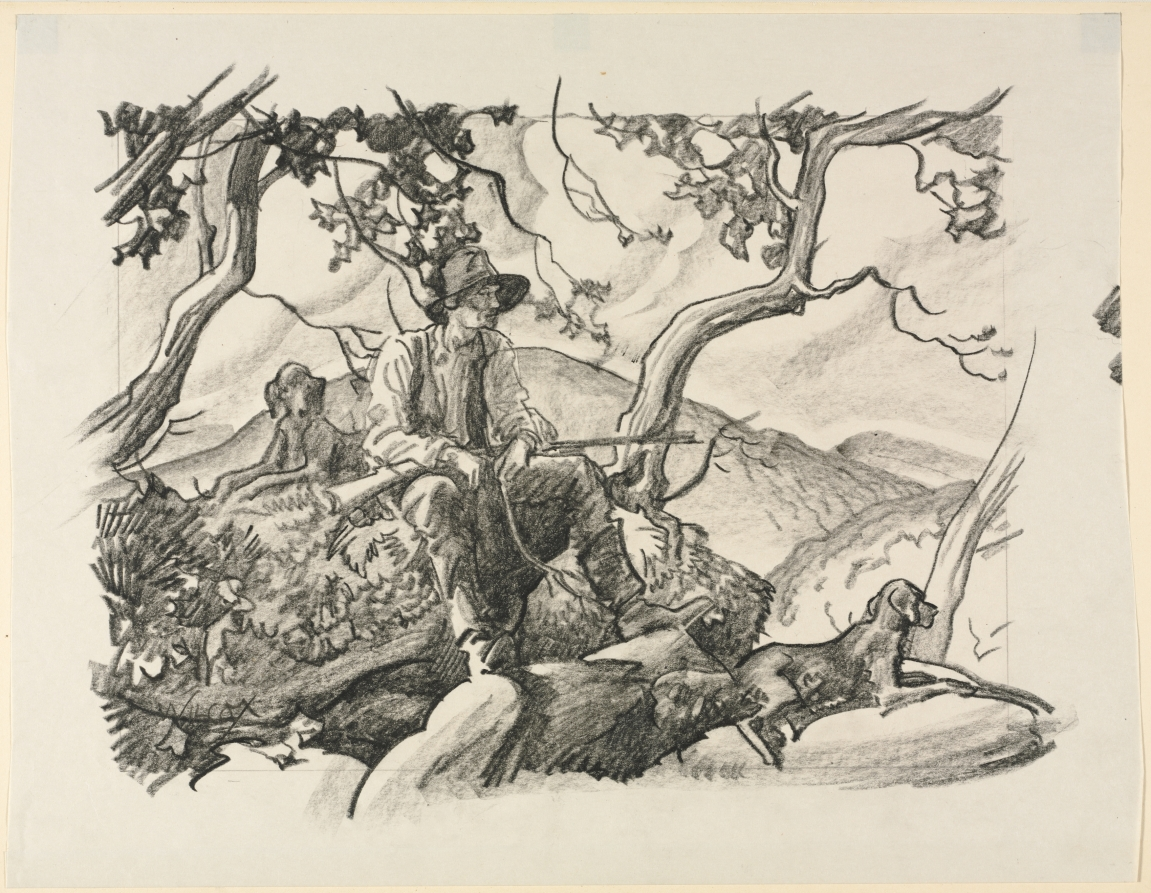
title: Mountain Top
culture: America, Ohio, Cleveland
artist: Frank Wilcox (American, 1887–1964)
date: c. 1928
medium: pencil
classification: Drawing